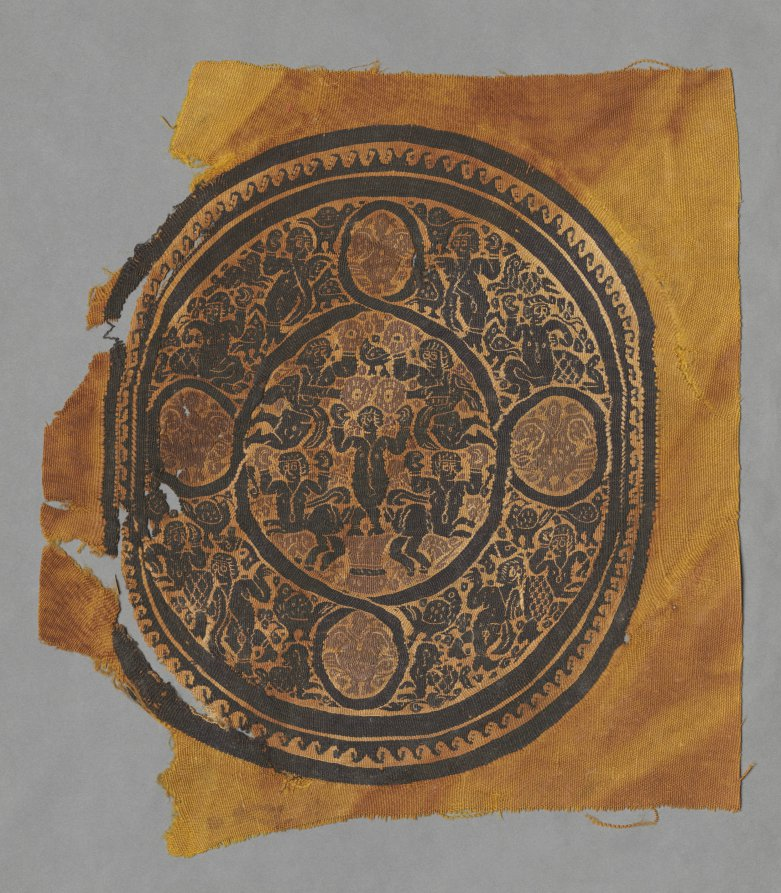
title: Fragment of Round Segmentum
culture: Africa, North Africa, Egypt, Coptic-style weaver(s)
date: 400s–600s CE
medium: Wool: tabby ground, inwoven tapestry ornament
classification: Textile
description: Segmentum (medallions) like this decorated tunics in Coptic Egypt. Medallions were woven into a tunic’s shoulders or lower half. This medallion's design scheme displays waves encircling geometric shapes and representational images. It features a cross-legged dancer balanced on a vase with hands raised prayerfully. Other dancers clang cymbals while satyrs frolic below them. Coptic can refer to a language, an ethnic group, a religion, or an artistic style (which wasn’t always Christian). Coptic classical imagery reflects the Hellenized (Greek, 305–30 BC) and Roman cultures of Egypt (30 BC–AD 395) before the Byzantine era.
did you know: Human figures with fish tails are woven into the border of this medallion.